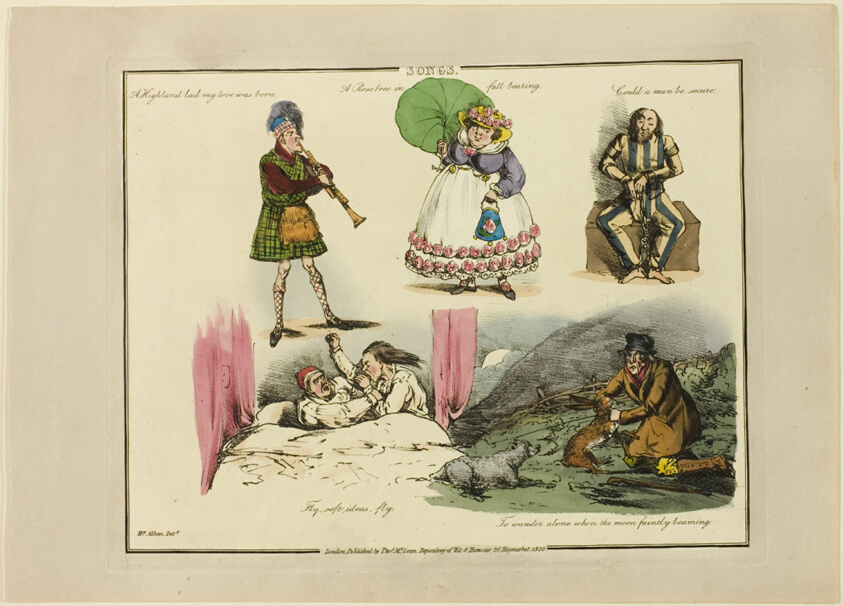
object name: Print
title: Plate from Illustrations to Popular Songs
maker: Henry Alken (English, 1785-1851); published by Thomas McLean (English, active 1790-1860)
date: 1822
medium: Soft ground etching with hand-coloring and aquatint on paper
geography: England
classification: etching; print; prints and drawing